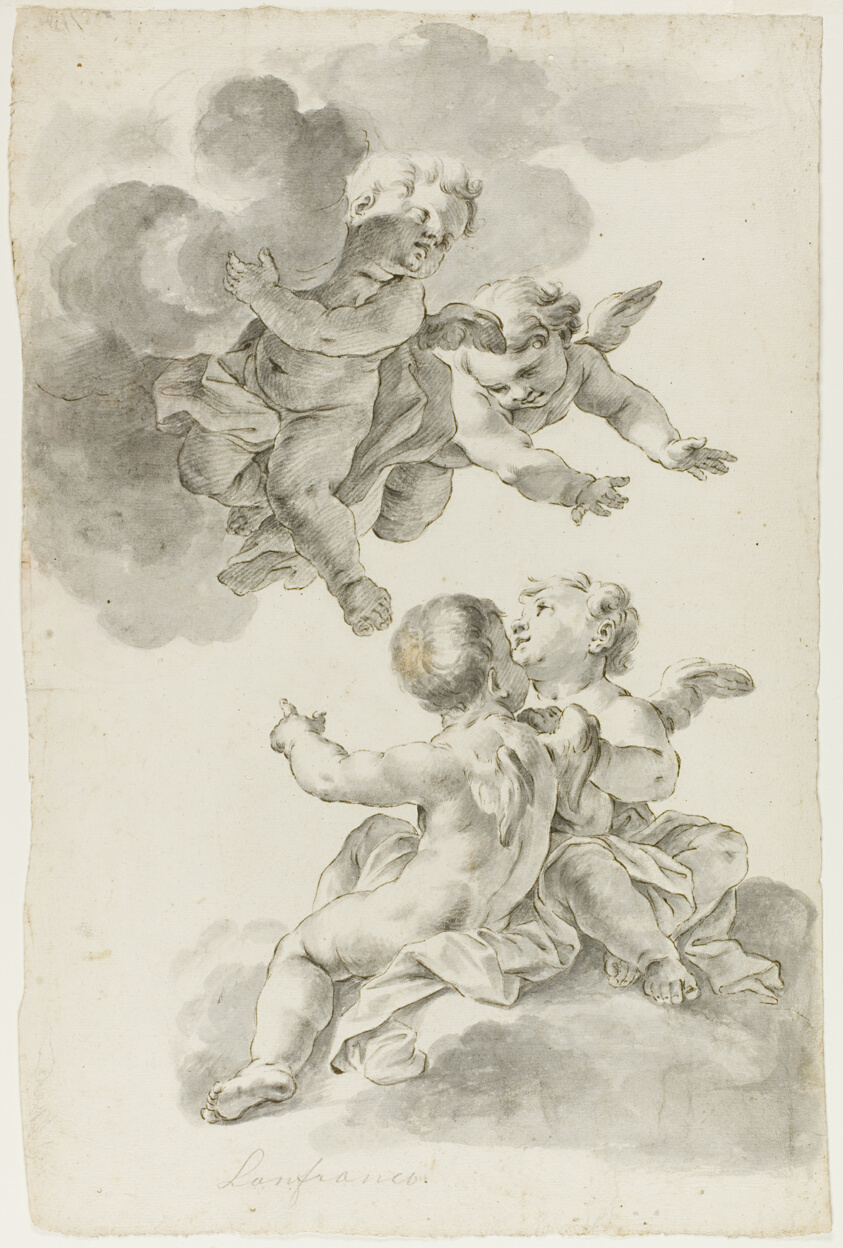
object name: Drawing and Watercolor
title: Four Putti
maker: probably the style of Giovanni Battista Gaulli (Italian, 1639-1709); or possibly the style of Giovanni Odazzi (Italian, 1663-1731); or Giovanni Lanfranco (Italian, 1582-1647)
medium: Pen and brown ink, with brush and gray wash, over black chalk, on ivory laid paper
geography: Italy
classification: drawings (visual works); prints and drawing